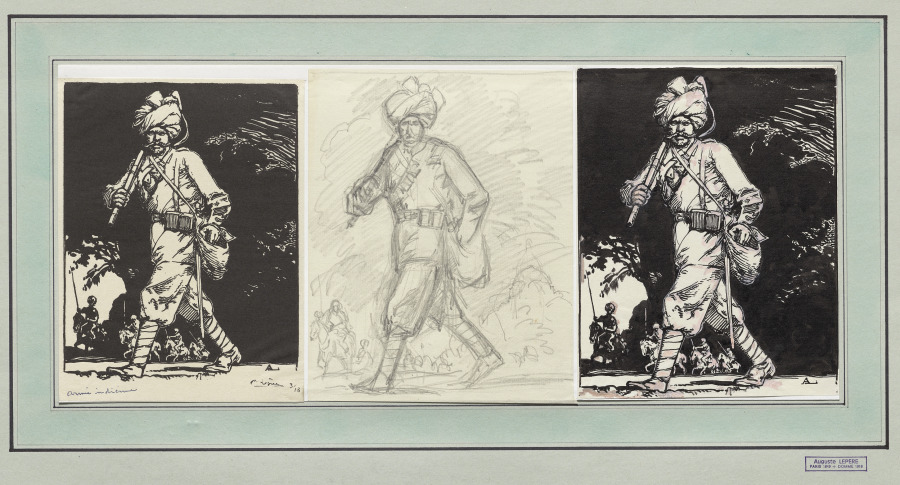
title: Armée indienne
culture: France, 20th century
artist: Auguste Louis Lepère (French, 1849–1918)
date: 1914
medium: pen and black ink over pencil with white highlights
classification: Drawing